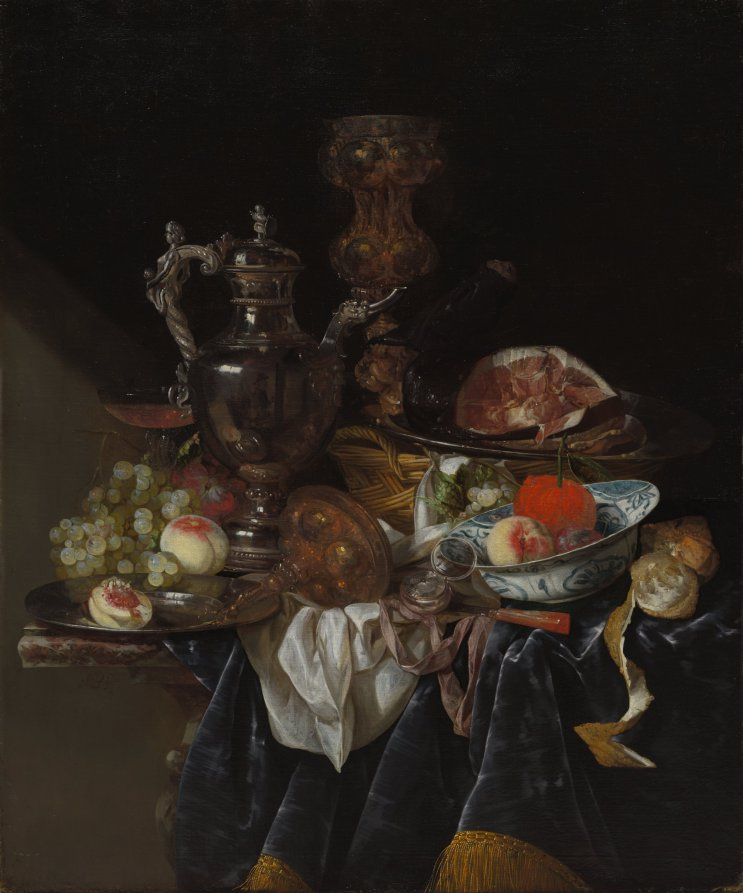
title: Silver Wine Jug, Ham, and Fruit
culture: Netherlands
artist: Abraham van Beyeren (Dutch, 1620/21–1690)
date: c. 1660–66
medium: oil on canvas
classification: Painting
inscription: Signed lower left: "AVB g. [monogram]"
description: With their typically large scale, and loose and energetic brushwork, Abraham van Beyeren’s opulent still life paintings were designed to be seen from a slight distance—perhaps installed over a mantelpiece. Here, for example, the silver wine jug is painted with rough strokes that seem almost abstract when viewed up close, but from a distance it becomes a fully realized object shimmering with complex reflections—including a ghostly self-portrait of the artist at his easel.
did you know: Look closely: the shimmering surface of the silver wine jug reflects a portrait of the artist at his easel.